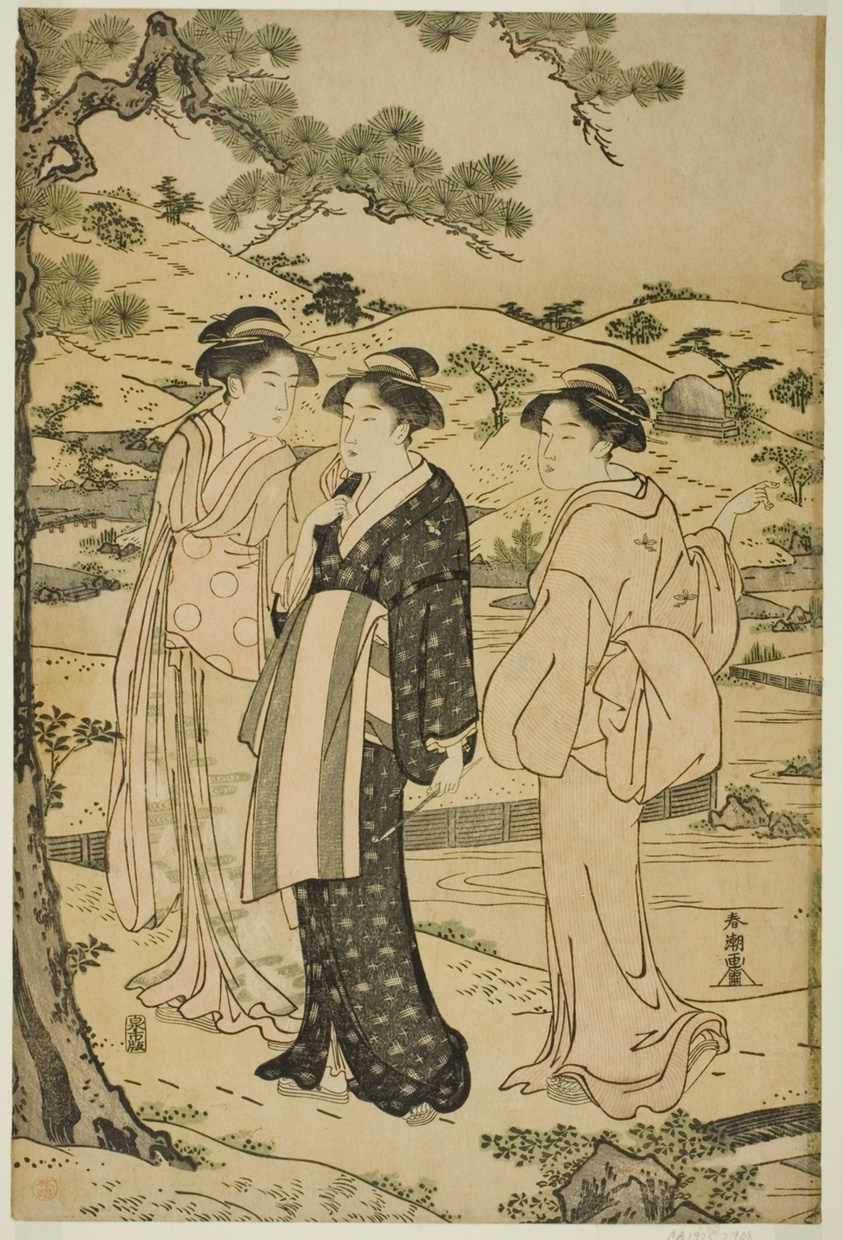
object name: Print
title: Women Visiting an Inari Shrine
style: Japanese (culture or style)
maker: Katsukawa Shuncho; Japanese, active c. 1780-1801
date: c. 1780/1801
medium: Color woodblock print; sheet from oban triptych (right: 1925.2707)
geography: Japan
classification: woodblock print; print; asian art